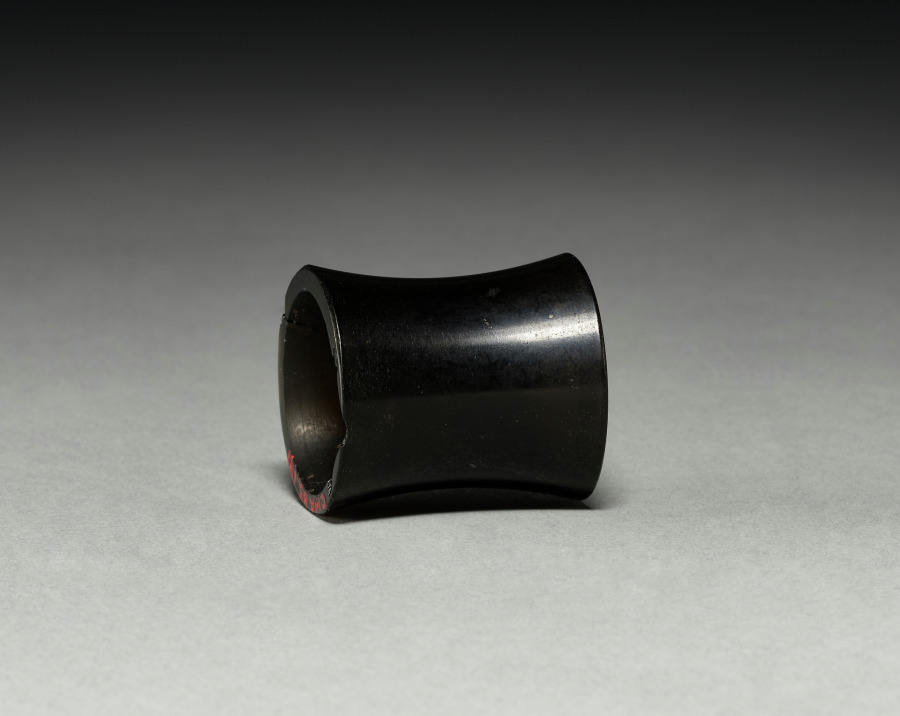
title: Ear Ornament (1 of 2)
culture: Mexico, Guerrero, Ichcatiopan, Mixtec or Aztec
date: c. 1200–1519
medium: obsidian, crystal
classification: Jewelry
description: This set of ear ornaments was reputedly found together with the gold and jade pectoral ornament shown nearby. They may have accompanied a noble burial, or perhaps constituted an offering deposit.